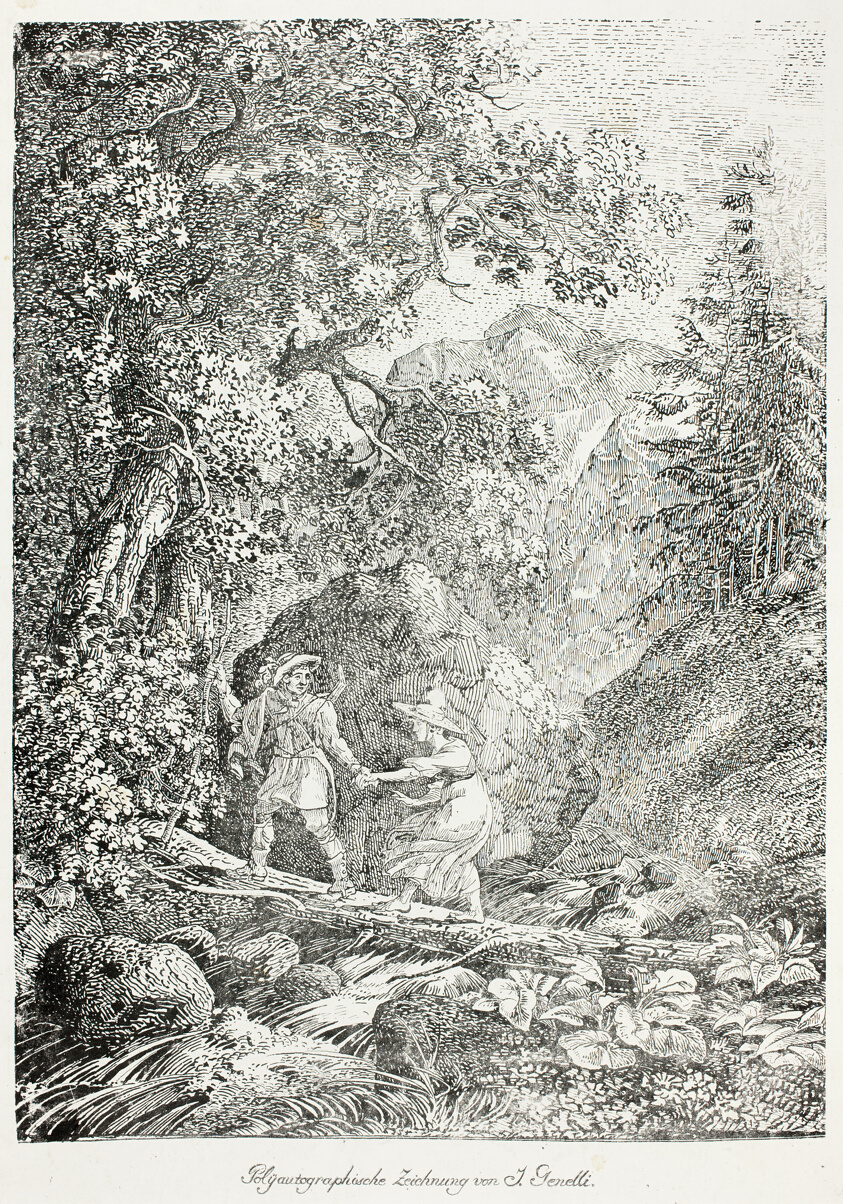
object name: Print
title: Hiker Crossing Over a Mountain Stream on a Tree Trunk with a Woman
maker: Janus Genelli (Danish, 1761-1813); published by Wilhelm Reuter (German, 1768-1834)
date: 1804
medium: Lithograph in black on white wove paper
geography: Denmark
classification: lithograph; print; prints and drawing